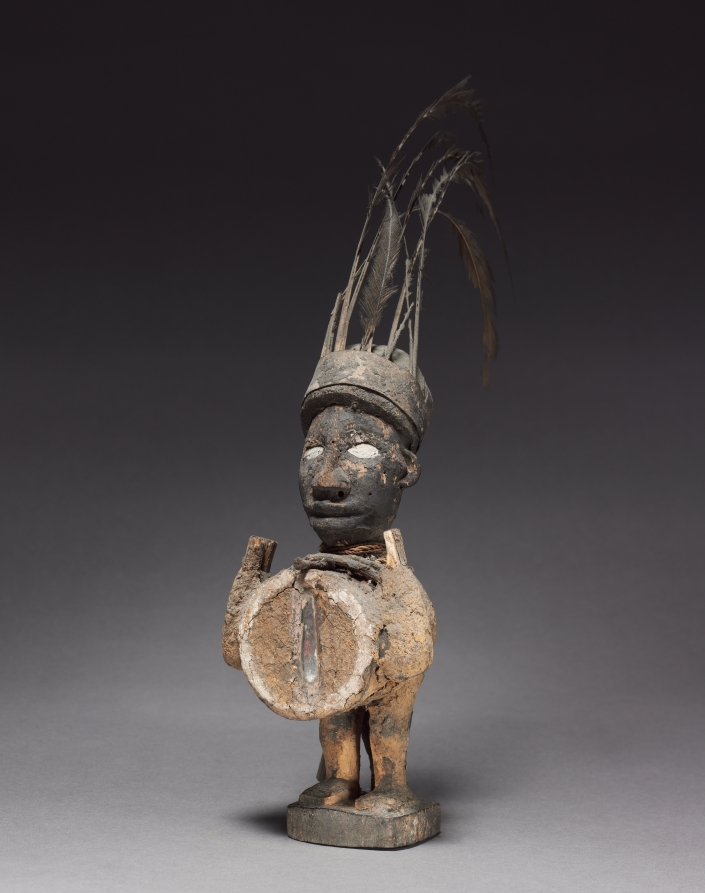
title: Power figure (nkisi)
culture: Africa, Central Africa, Republic of the Congo, Kongo-style maker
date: late 1800s-early 1900s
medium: Wood, metalized glass, organic materials (including resin), feathers, plant fibers, iron, and copper alloy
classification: Sculpture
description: One of seven minkisi figures previously in the René and Odette Delenne collection, this object contained medicines in which an ancestral spirit was believed to reside. This figure is one of the two tallest in the collection. Feathers of a bird of prey adorn its head, with two small guns pointing upward and a third hanging down. It had belonged to “the sorcerer of Louboulou.”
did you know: This is one of two tallest in the collection of spiritual figurines loaded with gunpowder to shoot at witches: nduda, or “night guns.”